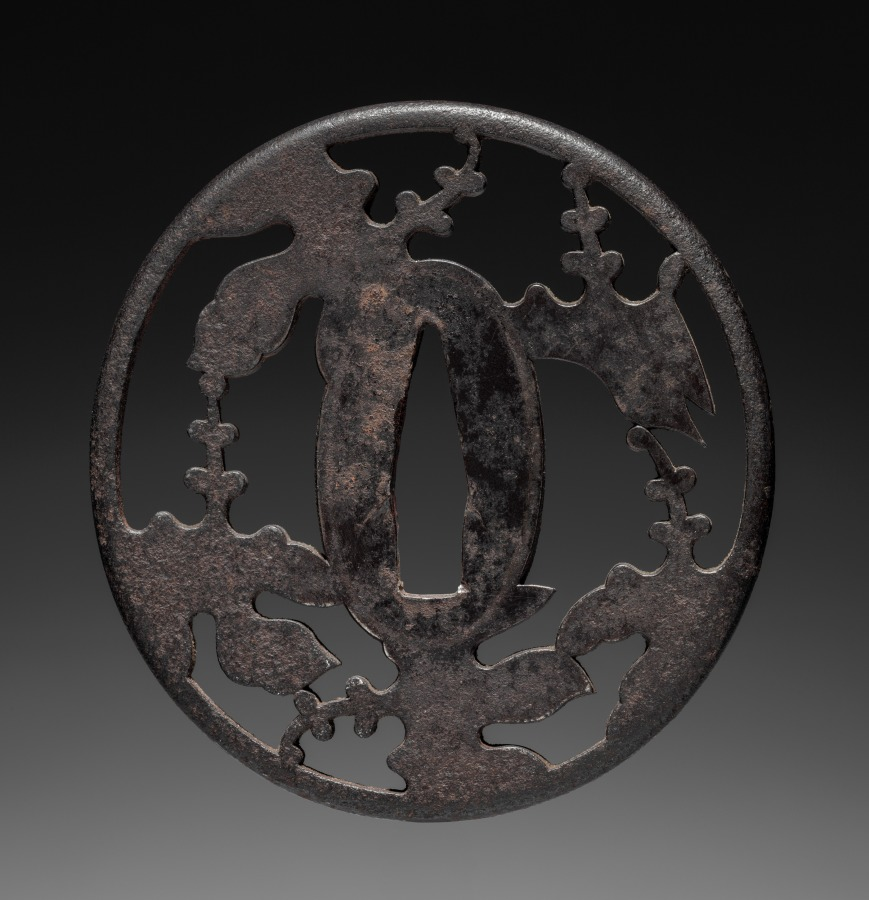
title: Sword Guard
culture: Japan, Edo period (1615–1868)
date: early 1800s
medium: iron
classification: Arms and Armor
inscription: Signature: Masanaga, residing in Musashi province, made